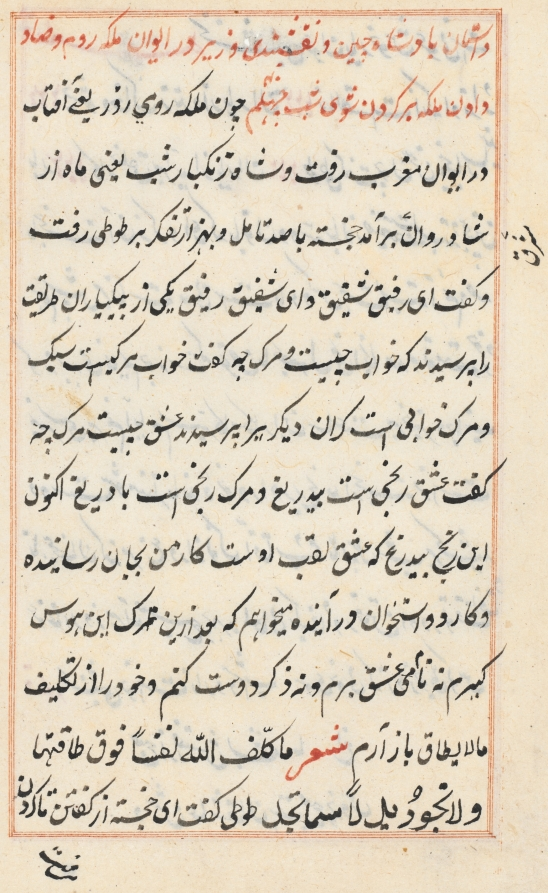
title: Page from Tales of a Parrot (Tuti-nama): text page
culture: Mughal India, court of Akbar (reigned 1556–1605)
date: c. 1560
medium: gum tempera, ink, and gold on paper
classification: Painting